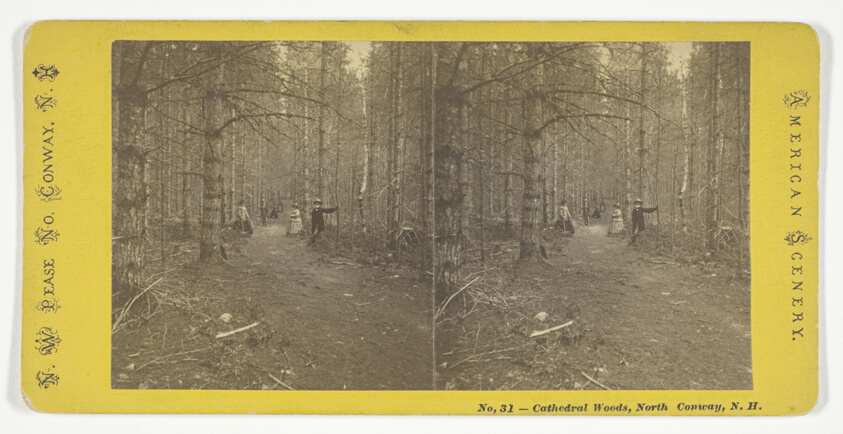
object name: Photograph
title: Cathedral Woods, North Conway, N.H.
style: 19th century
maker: N.W. Pease; American, active 1868-1878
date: Mid 19th century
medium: Albumen print, stereo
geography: New Hampshire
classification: photography; photograph